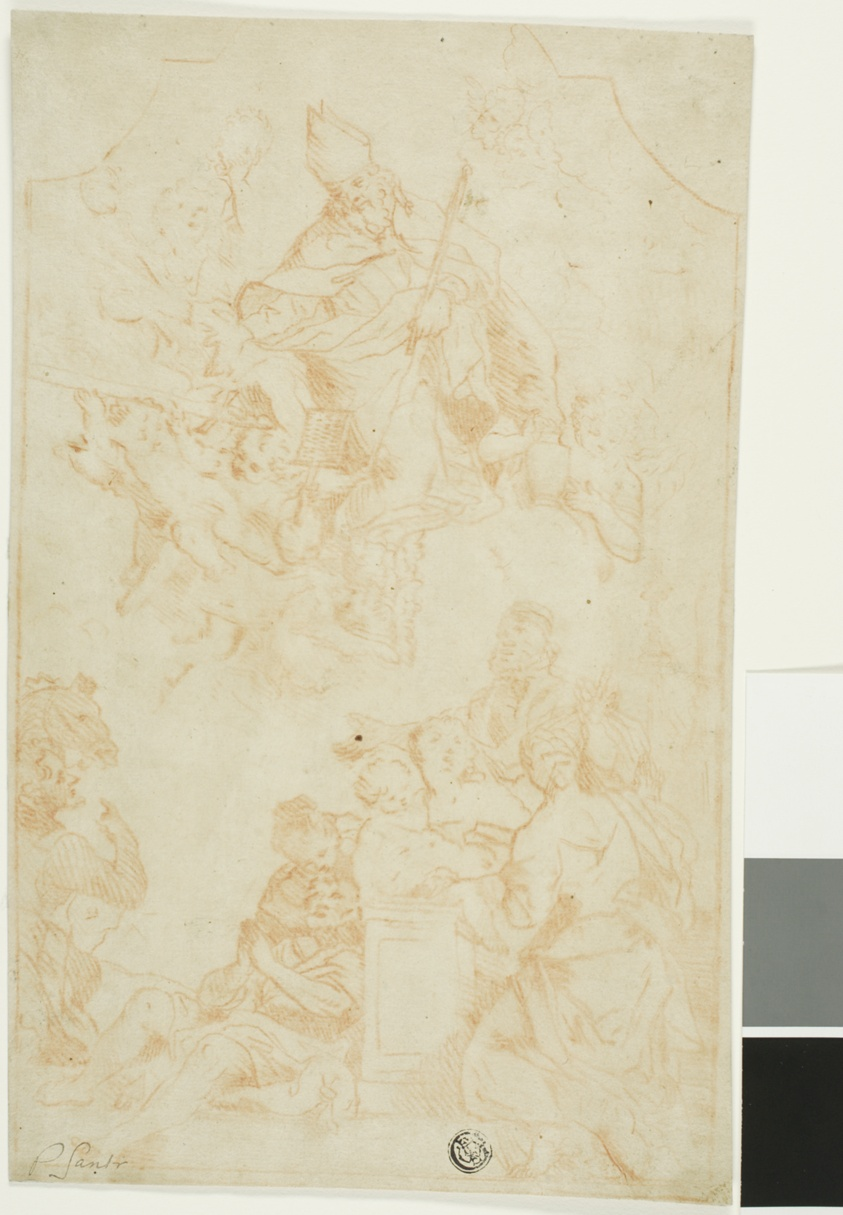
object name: Drawing and Watercolor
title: Miracle of Bishop Saint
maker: Attributed to Pietro Santi; Italian, c. 1635-1700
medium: Red chalk, transfered onto cream laid paper, laid down on tan laid paper with blue fibers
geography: Italy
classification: chalk; drawings (visual works); prints and drawing